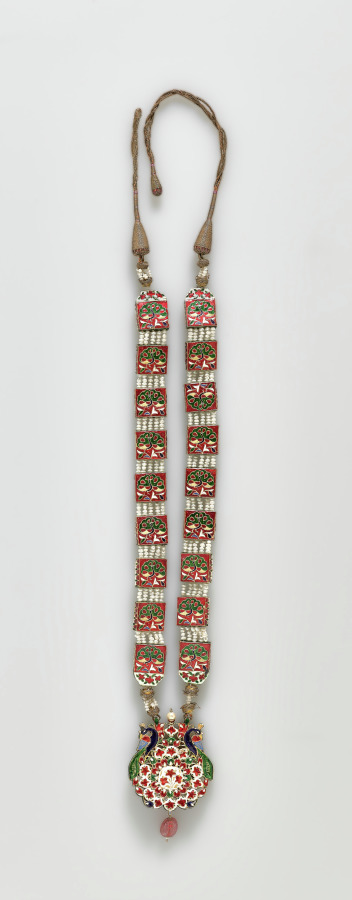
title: Jeweled Necklace and Pendant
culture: India, Delhi in the Punjab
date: before 1916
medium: gold, enamel and gems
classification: Jewelry